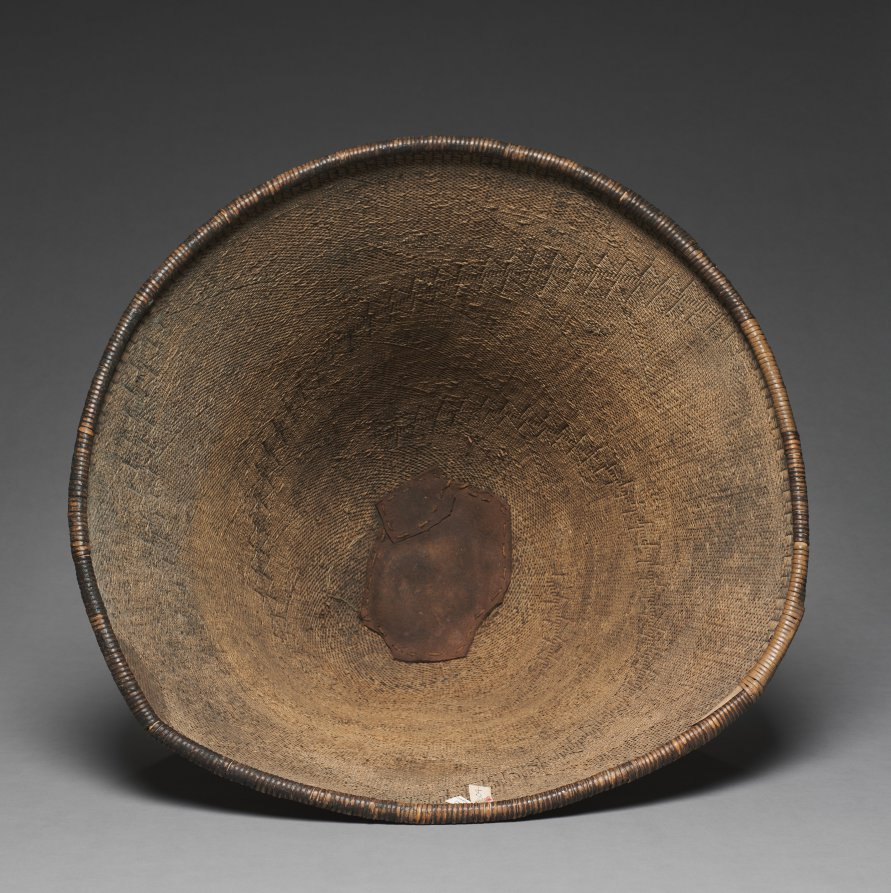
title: Burden Basket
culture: California, Pomo, central, late 19th century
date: 1880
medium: redbud, sedge; diagonal twine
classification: Basketry